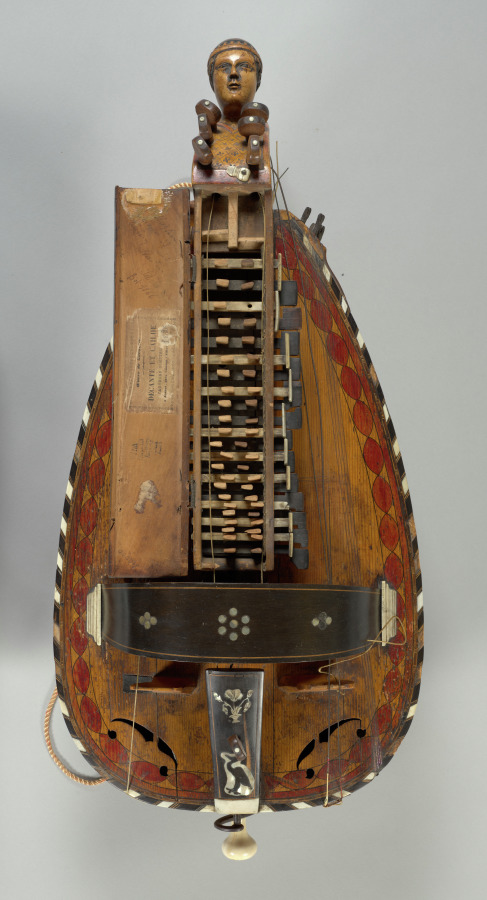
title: Vielle à Roue (Hurdy-Gurdy)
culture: France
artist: Jacques Decante (French, 1808–1884)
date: 1865–70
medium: Wood; mother-of-pearl inlay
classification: Musical Instrument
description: In France, the hurdy-gurdy is known as the vielle à roue (wheel fiddle). This six-stringed musical instrument produces sound by a hand crank-turned wheel that rubs against the strings. The wheel functions much like a violin bow, and single notes sound similar to those of a violin. Melodies are played on a keyboard that presses small wedges against the strings to change their pitch.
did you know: This vielle à roue was made in the French village of Jenzat, which was the manufacturing center for hurdy-gurdies during the 19th century.